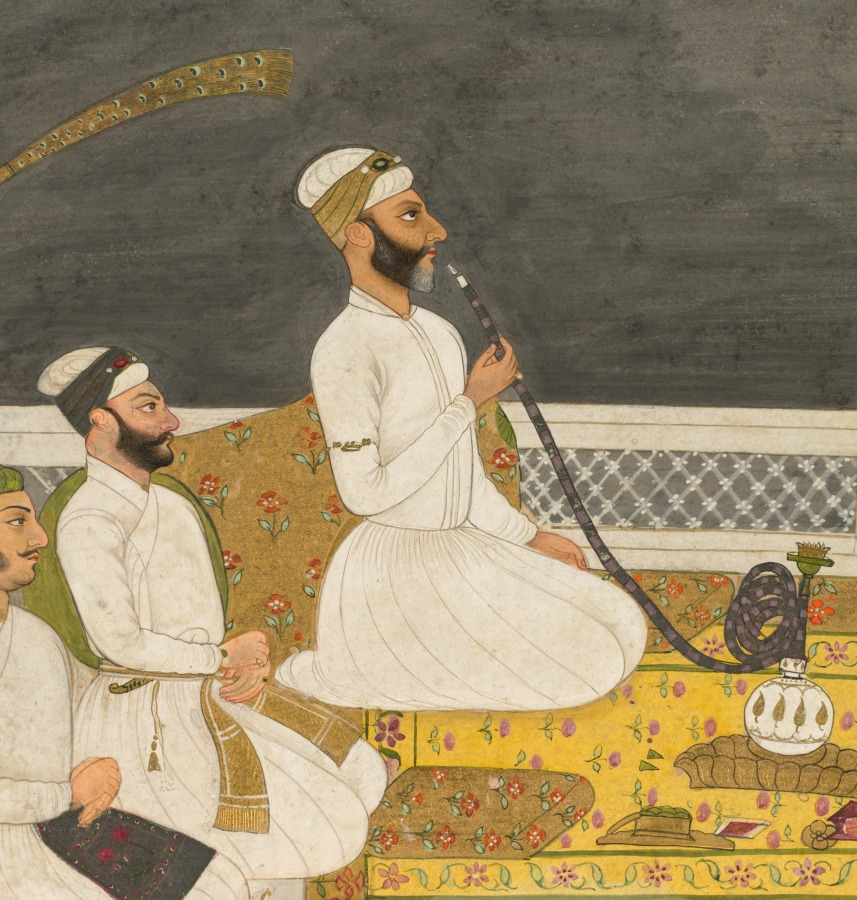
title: Husain Ali Khan Entertaining His Brothers (The Sayyid Brothers)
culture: India, Mughal Dynasty (1526-1756)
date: c. 1712–19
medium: Gum tempera, ink, and gold on paper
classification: Painting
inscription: Persian inscription at bottom, in nasta‘liq script: Portraits of Nawab Husayn-Ali Khan and Abdullah Khan and Najm al-Din Ali Khan and Fakhr al-Din Ali Khan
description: The shrewd imperial oligarch smoking the hookah and his brothers ran the Mughal government after the death of Emperor Alamgir in 1707 until the rise of Emperor Muhammad Shah in 1719. They were ruthless, self-serving kingmakers who caused the assassinations and accessions of six different members of the royal family to the Mughal throne in Delhi. The two attendants behind him exchange a worried glance, and the rare use of a flat gray sky behind the white marble terrace suggests the artist’s mood about the future strength and prosperity of the empire.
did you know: The man shown smoking a hookah is the Mughal imperial ruler.